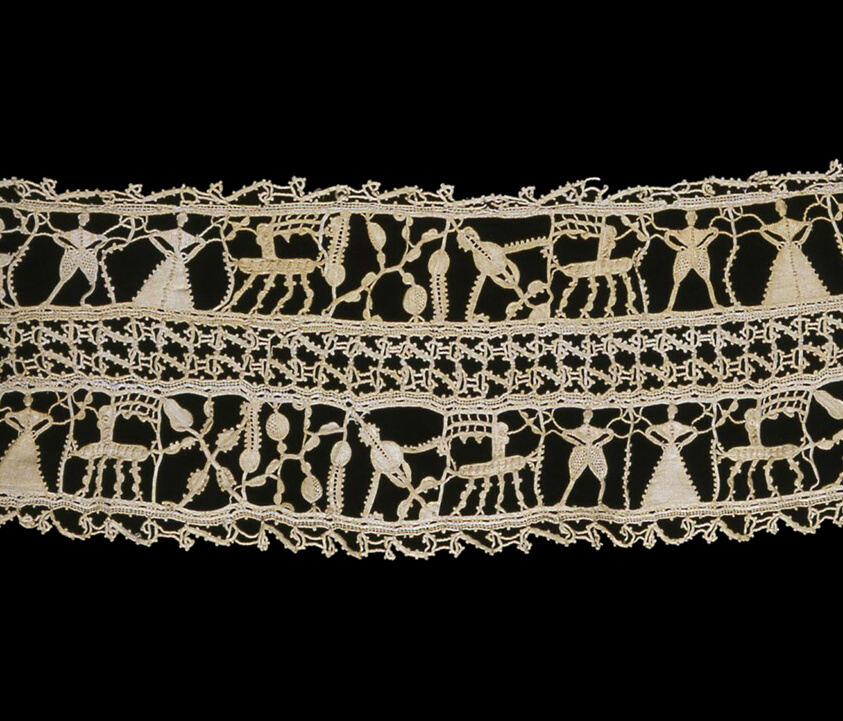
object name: Textile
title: Border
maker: Italy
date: 1575/1625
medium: Linen, three bands of needle lace; edged; with center band and edging worked on a plain weave cut and drawn thread work grid; embroidered in hem, and overcast stitches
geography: Italy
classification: textile; lace - needle